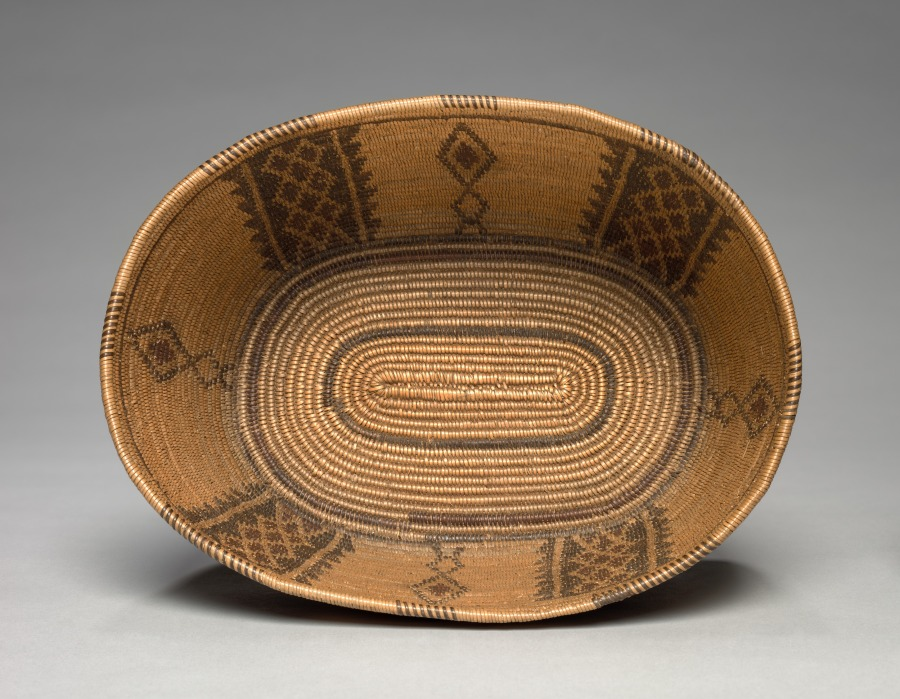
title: Bowl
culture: Great Basin, Timbisha Shoshone (Panamint)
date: c 1900–1910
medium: willow, devil's claw, yucca root; coiled (3 rods)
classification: Basketry